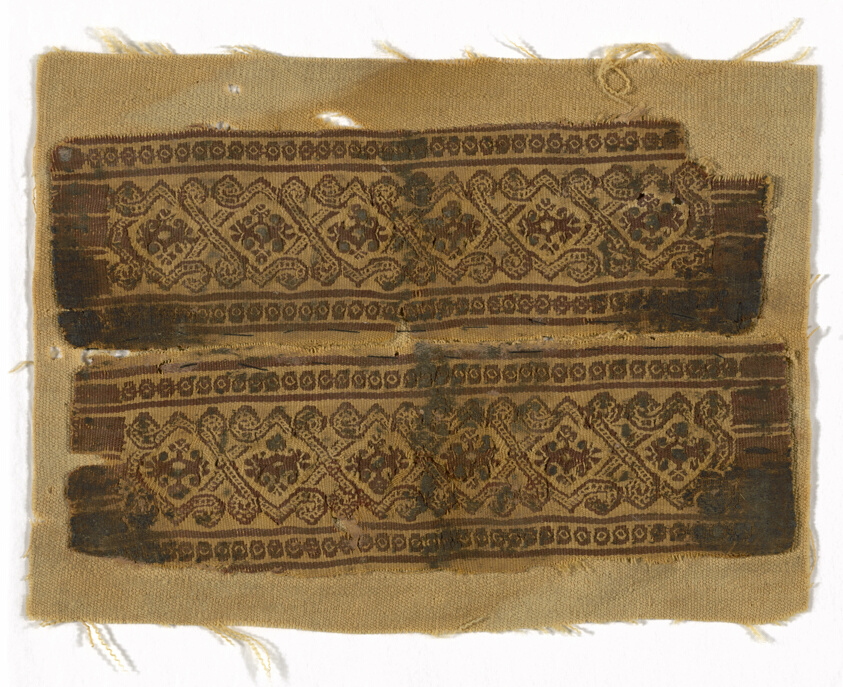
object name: Textile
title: Pair of Cuff Bands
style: roman period (egyptian)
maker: Coptic (Egypt)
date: Roman period (30 B.C.– 641 A.D.), 3rd/5th century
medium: Wool, tapestry weave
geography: Egypt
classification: textile; weaving; costume; dress (garment); clothing